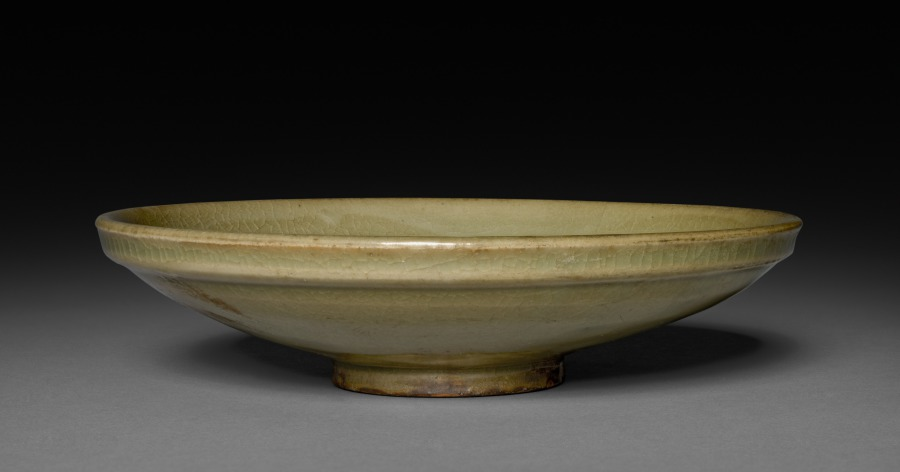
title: Saucer: Northern Celadon Ware, Yaozhou type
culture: China, late Northern Song dynasty (960-1127) - Jin dynasty (1115-1234)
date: 1100s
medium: glazed stoneware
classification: Ceramic